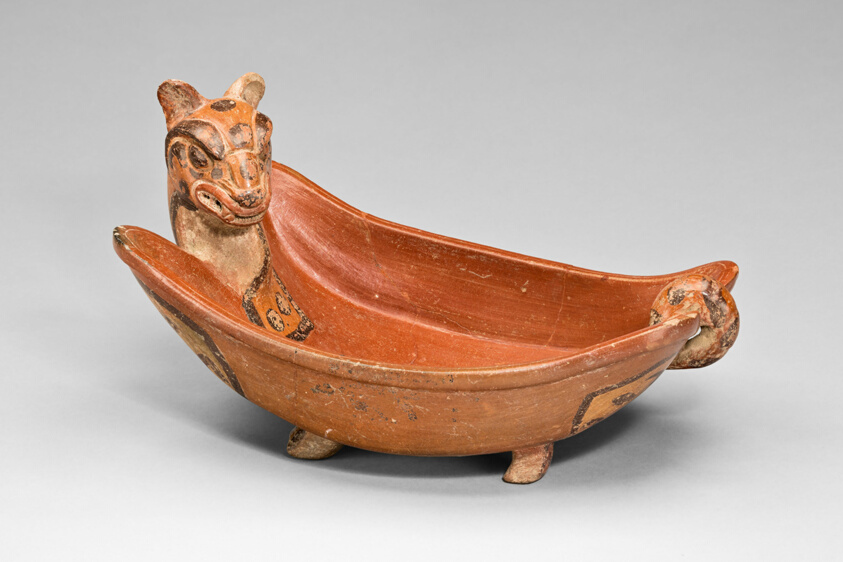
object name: Vessel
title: Open Bowl in the Form of a Jaguar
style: lower central america, Arts of the Americas, nicaragua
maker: Ometepe Island, Lake Nicaragua (Cocibolca), Nicaragua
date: 600–900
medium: Ceramic and pigment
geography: Isla de Ometepe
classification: bowl; art of the americas; ceramics; vessel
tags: animals